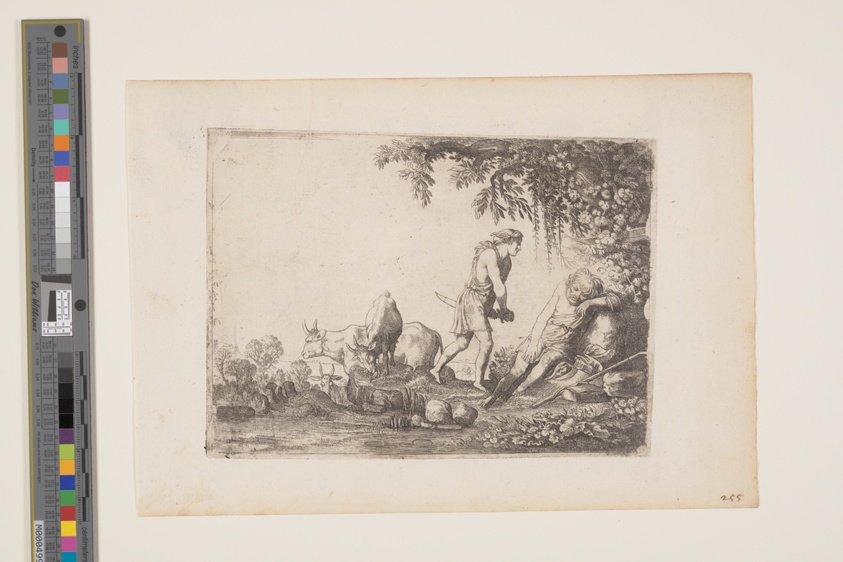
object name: Print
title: Mercury Slays Argus, from The Story of Mercury and Argus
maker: Moses van Uyttenbroeck (Dutch, c. 1595–before 1647)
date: c. 1620-26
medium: Etching on ivory laid paper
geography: Netherlands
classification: etching; paper; print; prints and drawing